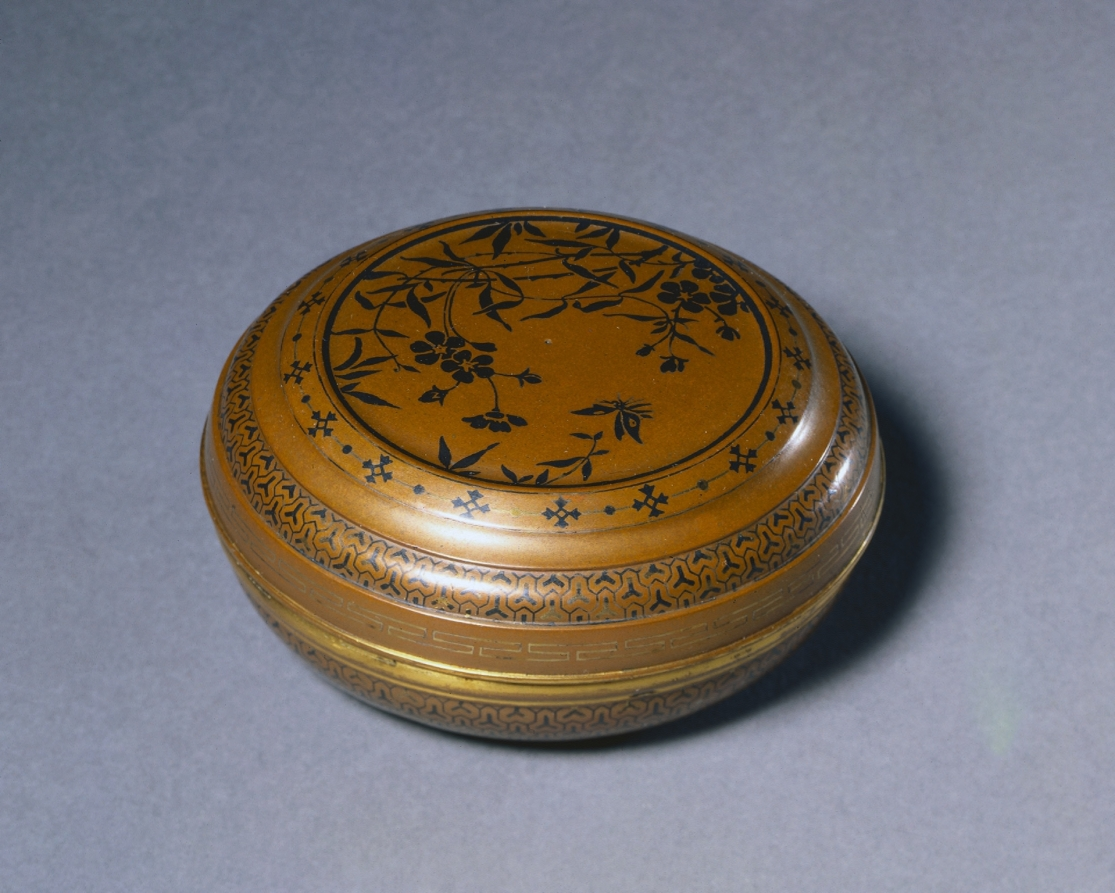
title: Circular Box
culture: France, 19th century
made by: Paul Christofle (French, 1838–1907)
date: c. 1880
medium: metal (brass?) with inlays of niello and gold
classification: Metalwork